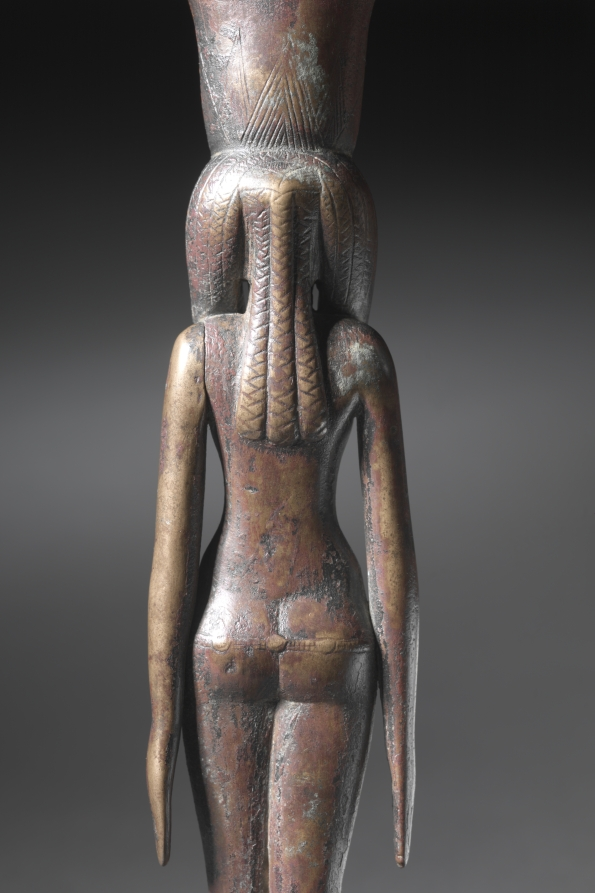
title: Caryatid Mirror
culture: Egypt, New Kingdom (1540–1069 BCE), Dynasty 18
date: c. 1540–1296 BCE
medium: bronze with black copper inlay?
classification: Cosmetic Objects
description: This superb mirror has an oval disk and a handle in the form of a nubile young girl, entirely naked except for her elaborately braided tripartite wig, broad collar, and a girdle of wallet beads. She stands on a cruciform base, with her left foot slightly advanced and her hands at her sides. On her head and supporting the disk is a papyrus umbel with flaring tips. Mirrors with handles in the form of naked young girls were the height of fashion in mid-Dynasty 18; numerous examples exist. This mirror is perhaps the finest of its kind. The cruciform base is unusual, if not unique. The iconography is understandable in relation to the goddess Hathor, the embodiment of love and beauty. A multifaceted goddess, she was equated with Aphrodite by the Greeks. The retinue of Hathor consisted precisely of such beauties, called nefrut in Egyptian, and the mirror itself, that reflection of beauty, appears to have had Hathorian connections from early times.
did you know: When they were made, this mirror was polished to a brilliant shine; the marvelous colored patina it has since acquired is the result of being buried for years in the ground.